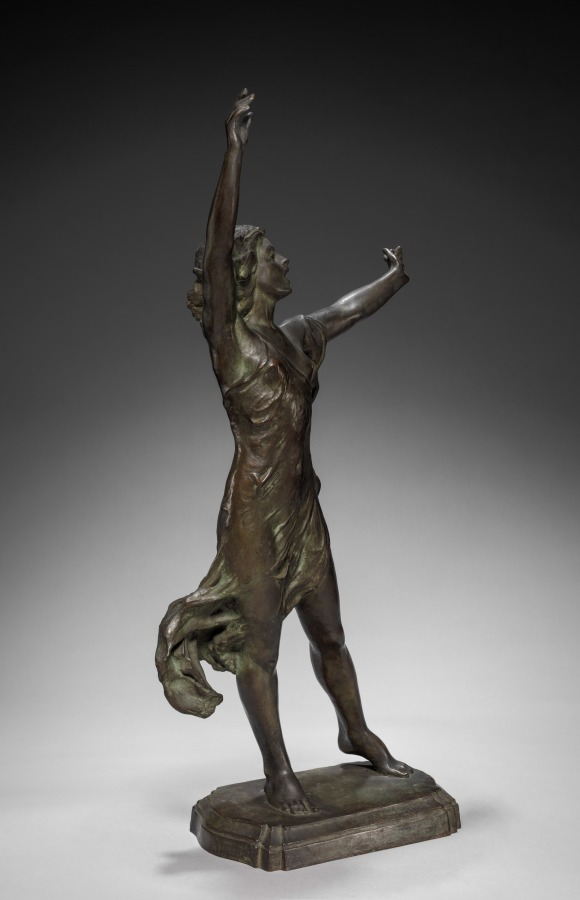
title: Pippa Passes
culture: America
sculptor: Louise Allen (American, 1880–1953)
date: c. 1916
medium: bronze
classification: Sculpture